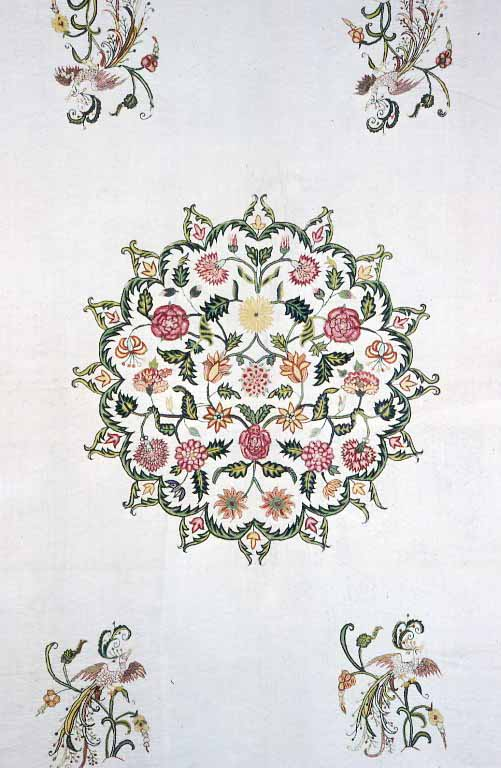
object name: Textile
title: Bedcover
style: regency, european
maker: England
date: c. 1734/40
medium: Linen, plain weave; embroidered through only one thickness in polychrome wool yarns in chain, buttonhole, link powdering, seed, wheel ear, flat and back stitches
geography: England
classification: textile; needlework (visual works)